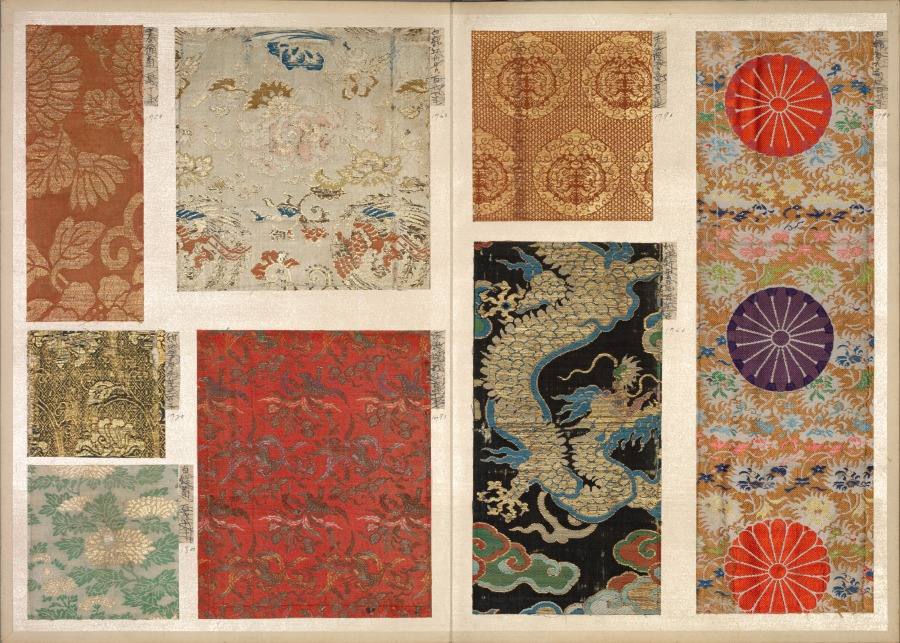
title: Album of Textile Samples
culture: Japan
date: 1790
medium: silk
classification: Textile